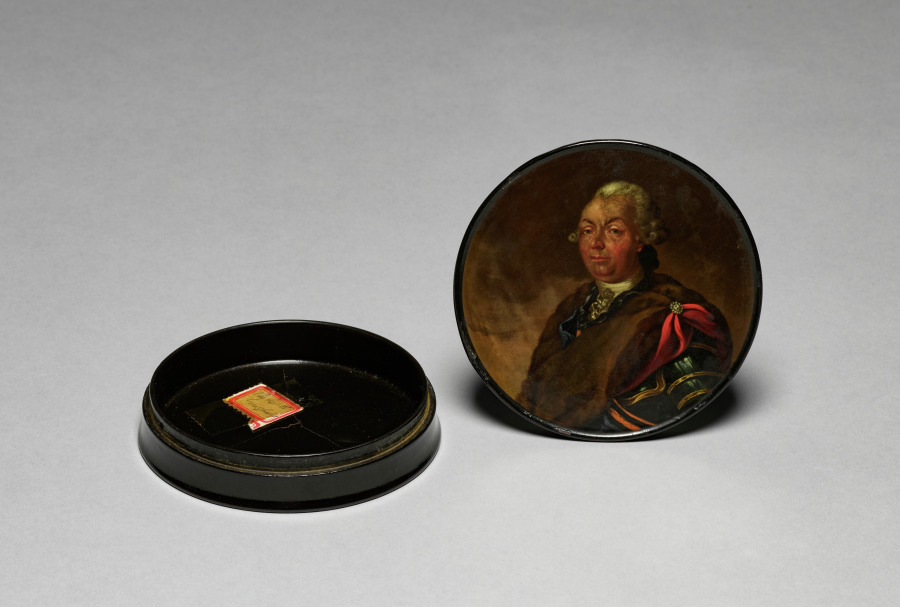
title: Box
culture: Germany, late 18th Century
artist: possibly studio or workshop of Johann Heinrich Stobwasser (German, 1740–1829)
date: late 1700s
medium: lacquered wood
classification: Miscellaneous